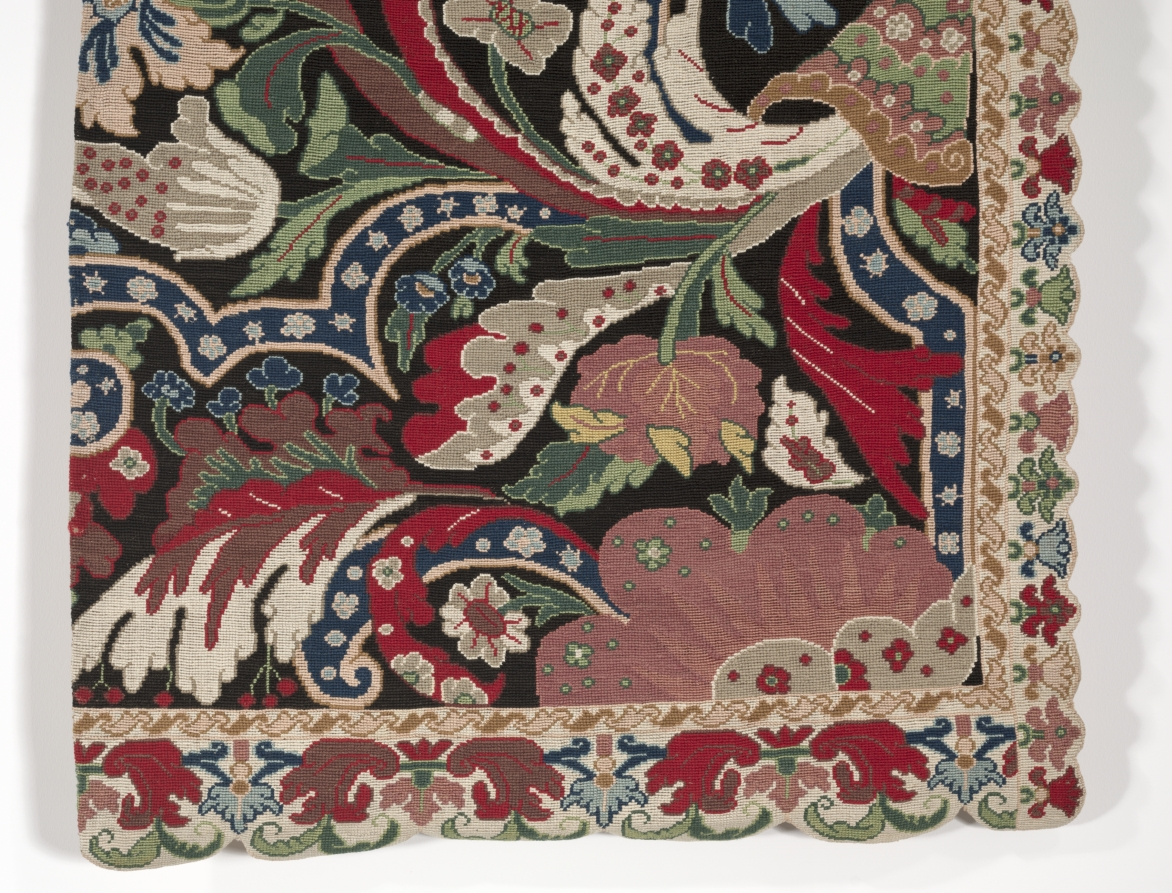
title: Needlework Bed Hanging in the Bizarre style (right half)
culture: France, 18th century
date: 1710–20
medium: needlework, tent and cross stitch embroidery on canvas; silk, wool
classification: Embroidery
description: This panel is one of a pair that would have hung originally around a bed post as part of a full set of hangings on a bedstead in the early 1700's. Elaborate textile hangings were a conspicuous display of wealth since many ladies received their friends within their bedchamber. A full set enveloped the entire bedstead and, when closed, helped retain warmth long after the fire had gone out. This particular pair of panels is remarkable in that they represent many hours of highly skilled needlework. Their design is known as a "bizarre" pattern, which mimicked woven silks of the same era that were asymmetrical, boldly stylized adaptations of Asian fabrics that were coming into the European market from the trading routes at the time.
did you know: The design of this needlework panel is known as a "bizarre" pattern.